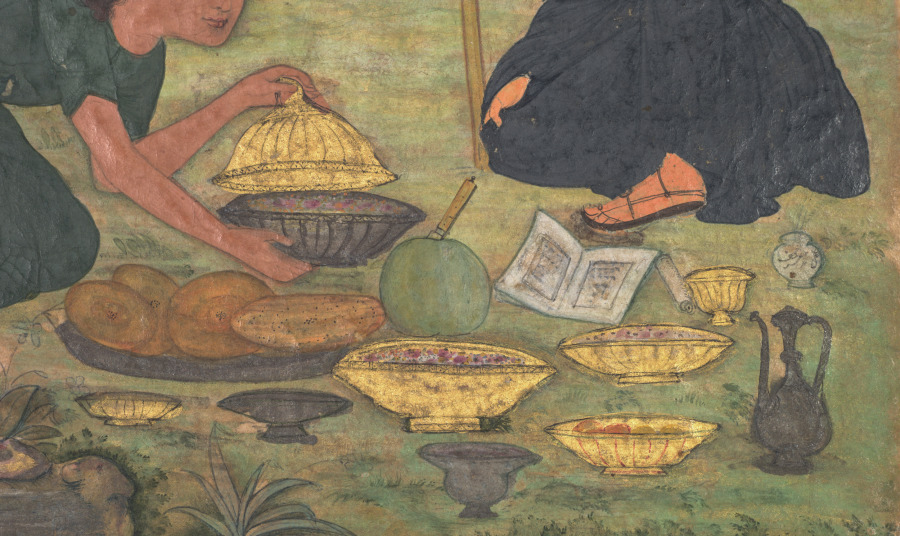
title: Angels bring food to Jesus in the wilderness (folio 55 recto), from a Mirror of Holiness (Mir’at al-quds) of Father Jerome Xavier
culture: Mughal India, Allahabad, made for Prince Salim (1569–1627)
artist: Muhammad Sharif (Indian, active c. 1600)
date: 1602–4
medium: Gum tempera, ink, color, and gold on paper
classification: Manuscript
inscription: Signature of the artist, Muhammad Sharif (Indian, active c. 1600), is written in the tiny pot by Jesus's foot.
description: To end his 40-day fast, five angels brought Jesus refreshments from heaven: breads, melons each with a knife for convenient cutting, fresh leeks, and what appear to be fragrant rice dishes and curries, along with cups of wine. Four of the angels are dressed in robes, and one is clothed only in feathers. After his baptism, Jesus spent 40 days and nights in the desert where he fasted, practiced spiritual exercises, and successfully resisted the temptations of Satan. Many of the rocks in this painting have faces, called grotesques. This page is the only surviving folio from this manuscript that has an artist’s signature, written in the tiny pot by Jesus’s foot.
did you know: The artist has put faces in the rocks, following a Persian convention.